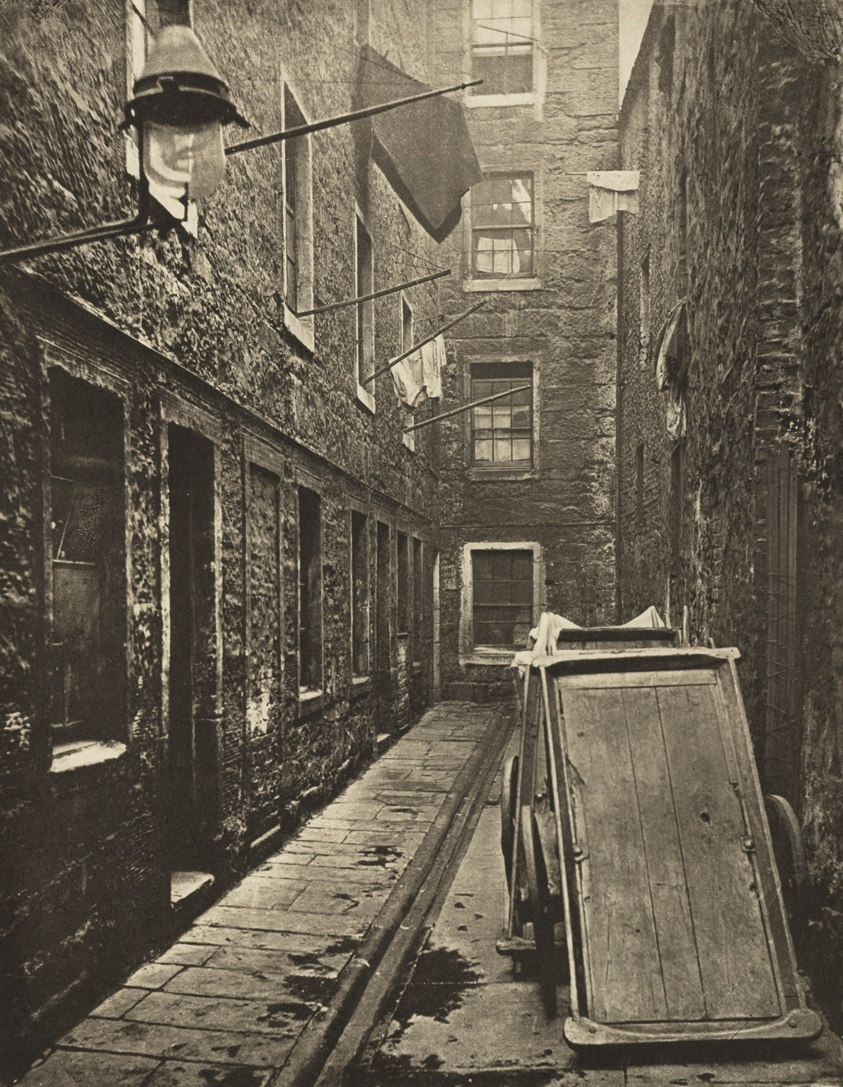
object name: Photograph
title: Close No. 136 Saltmarket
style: 19th century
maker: Thomas Annan (Scottish, 1829–1887)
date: 1868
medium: Photogravure, plate 31 from the book "The Old Closes & Streets of Glasgow" (1900)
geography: Scotland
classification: photograph; photography